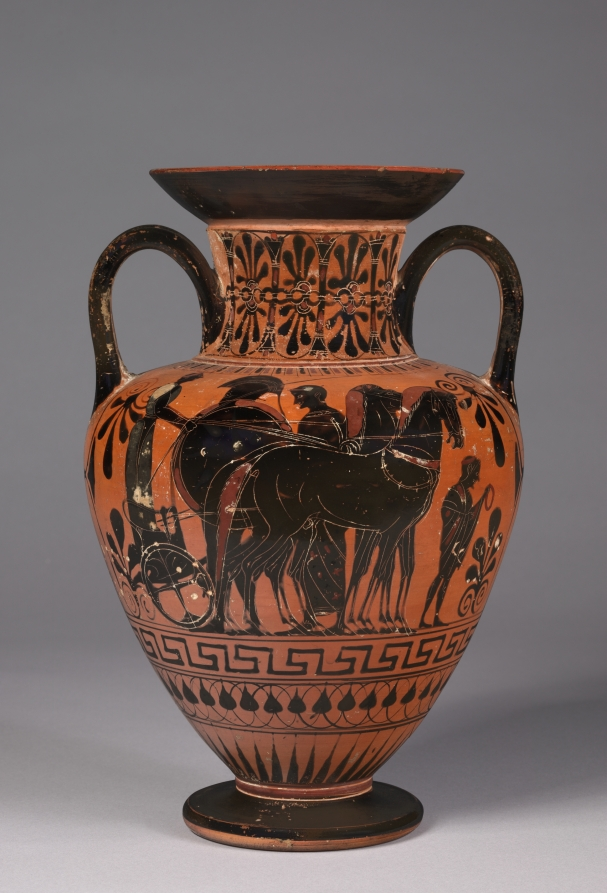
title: Black-Figure Neck-Amphora (Storage Vessel): Departing Warrior with Chariot (A); Battling Warriors (B)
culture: Greek, Attic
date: c. 520–510 BCE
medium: ceramic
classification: Ceramic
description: The two sides of this neck-amphora both depict warriors—one preparing to depart for battle in a four-horse chariot, three doing battle on the other side. Two of those battling hold spears and so-called “Boiotian shields,” with cutout sides, while the vanquished warrior holds only a round shield, apparently having lost his weapon. The departing warrior also holds a round shield, but the faded devices of these round shields differ on the two sides (a rosette and a bucranium, respectively), suggesting that the warriors carrying them differ as well.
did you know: A neck-amphora is a type of amphora with separately constructed neck and body.